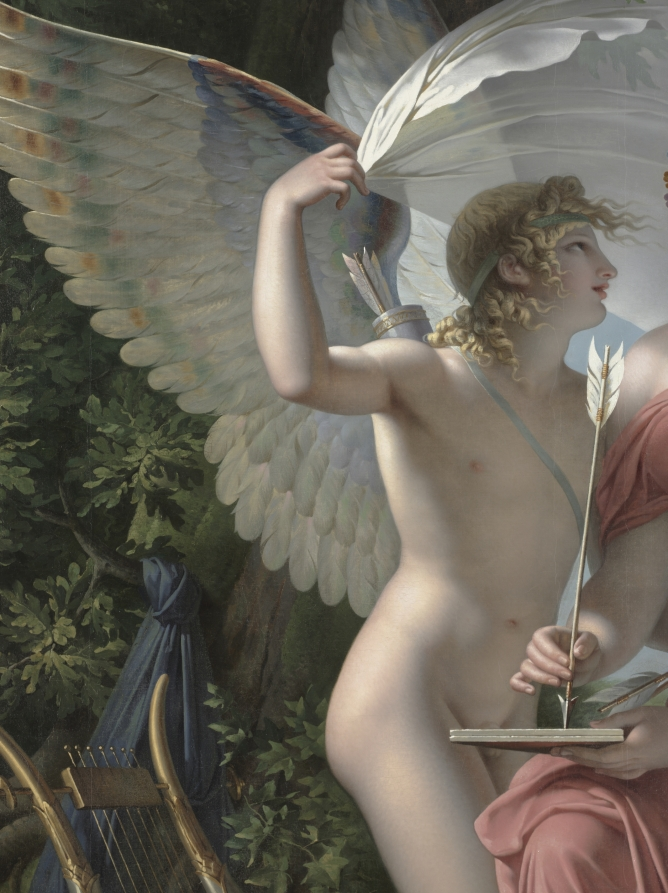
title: Erato, Muse of Lyrical Poetry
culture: France, late 18th-early 19th century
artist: Charles Meynier (French, 1768–1832)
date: 1800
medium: oil on canvas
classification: Painting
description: Erato, the muse of lyric and erotic poetry, is often depicted with a golden arrow received from Eros or Cupid, a sign of the emotion that inspires her.